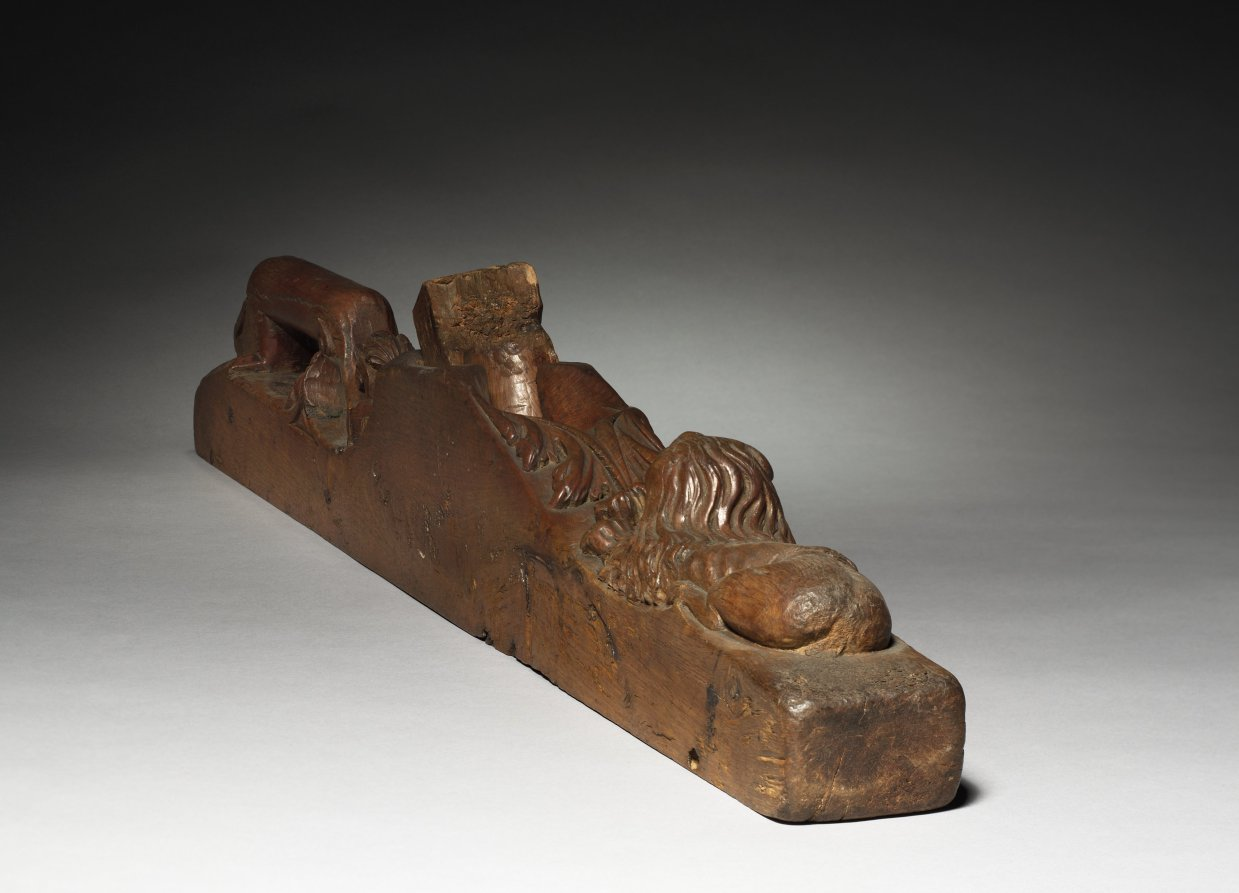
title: Plane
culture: Spain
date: 1600s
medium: oak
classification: Tool